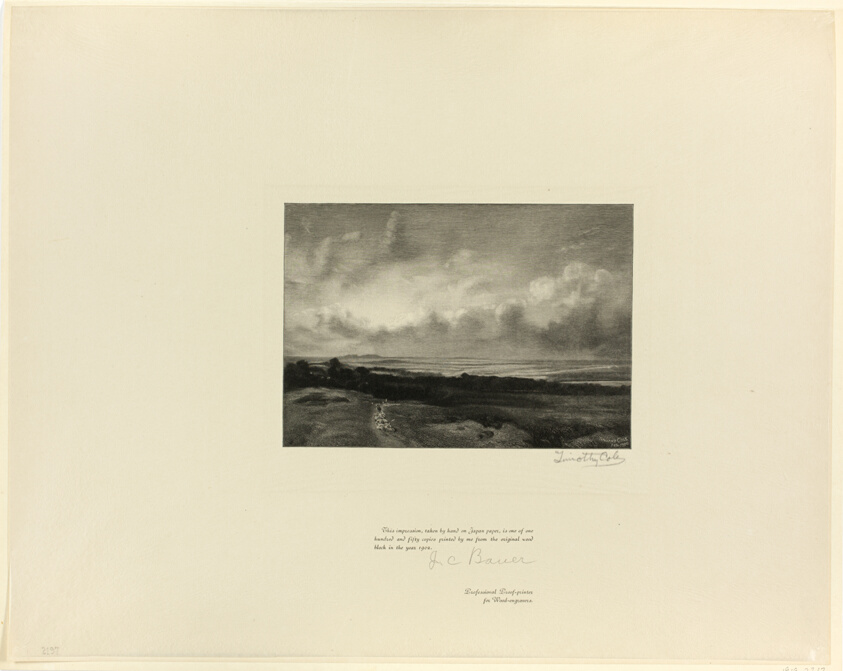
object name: Print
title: Hampstead Heath, from Old English Masters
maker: Timothy Cole (American, born England, 1852-1931); after John Constable (English, 1776-1837)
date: 1901, printed 1902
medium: Wood engraving on chine paper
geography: United States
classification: wood engraving; print; prints and drawing